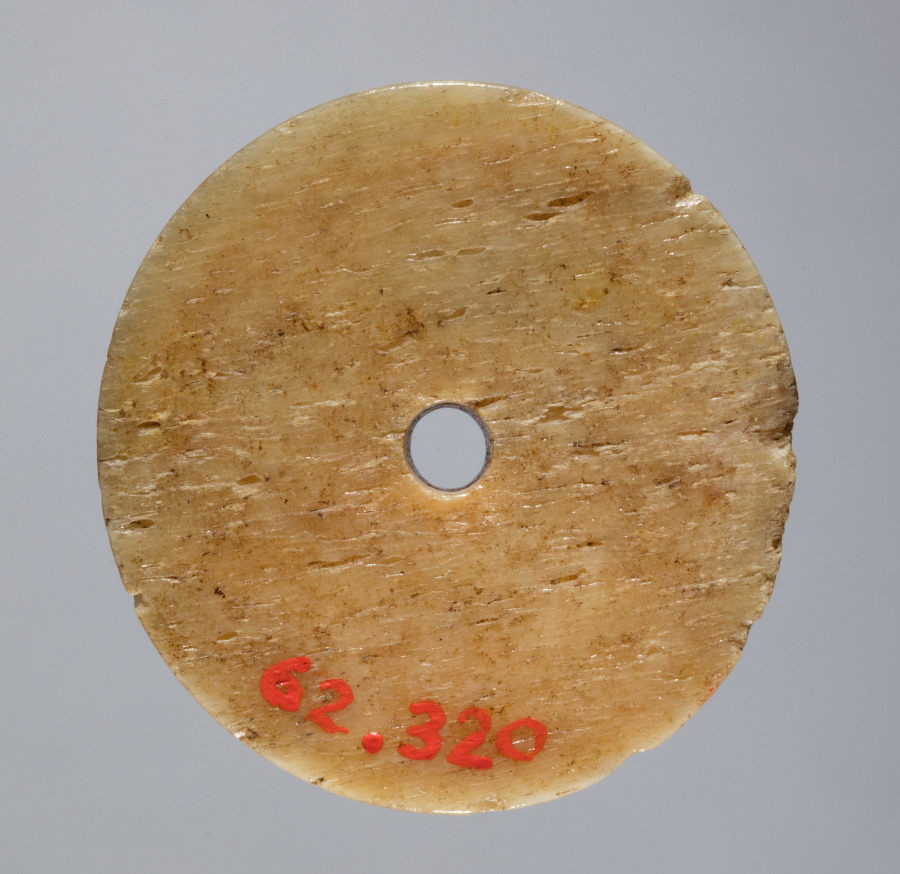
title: Spindle Whorl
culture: Iran, early Islamic period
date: 700s–900s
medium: bone, incised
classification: Spindle Whorl